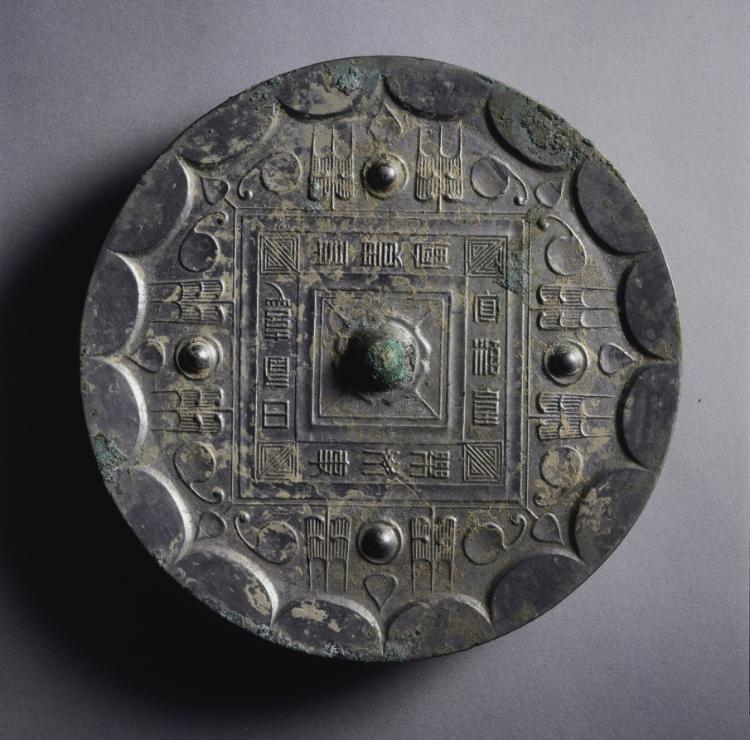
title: Mirror with a Square Band, Four Nipples, and Grass Leaf Motifs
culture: China, Western Han dynasty (206 BCE–8 CE)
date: 100s BCE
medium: bronze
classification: Metalwork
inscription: 長貴富，宜酒食，樂母事，日有熹。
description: Inscription: May you enjoy lasting fortune. May you enjoy wine and food. May you enjoy freedom from worry. May your days be replete with happiness.